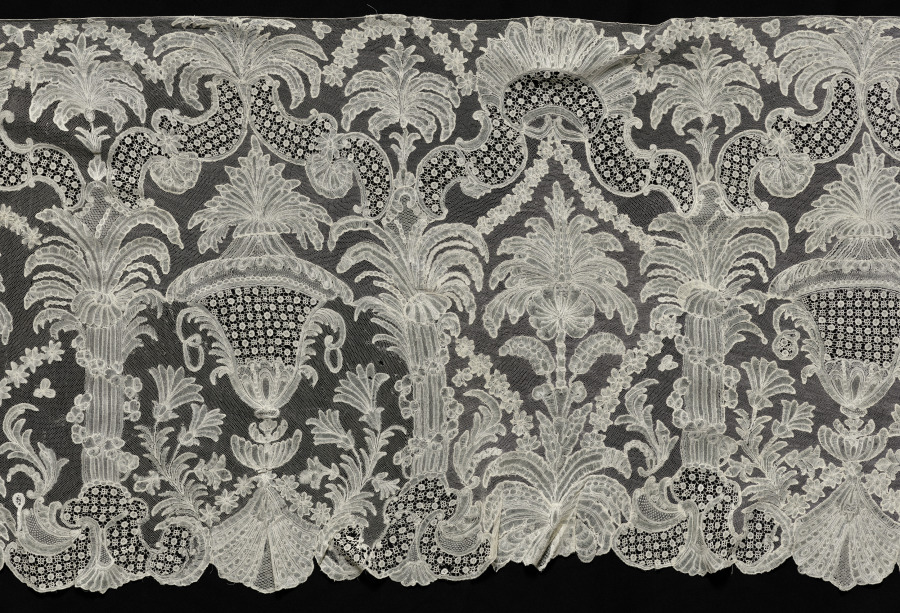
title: Lace Flounce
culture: Belgium, Brabant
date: 1700s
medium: Linen: bobbin lace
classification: Lace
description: This lace flounce depicts an urn alternating with a large floral motif.